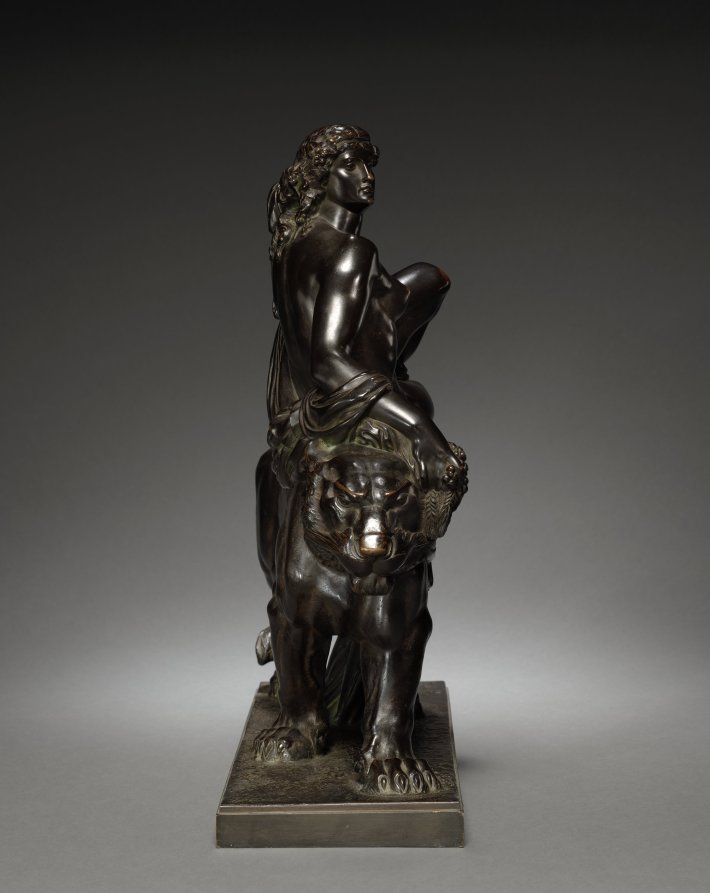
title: Ariadne on a Panther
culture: France, 19th century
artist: Jean-Baptiste Clésinger (French, 1814–1883)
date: 1873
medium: bronze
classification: Sculpture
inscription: signed on side of base: "J. CLESINGER"; inscribed around edge of stamp: "BRONZE ARTISTIQUE/DE PARIS"; on cut of neck of woman, "CAYUZ"; on edge of base: "1 Rue de la PAIX."